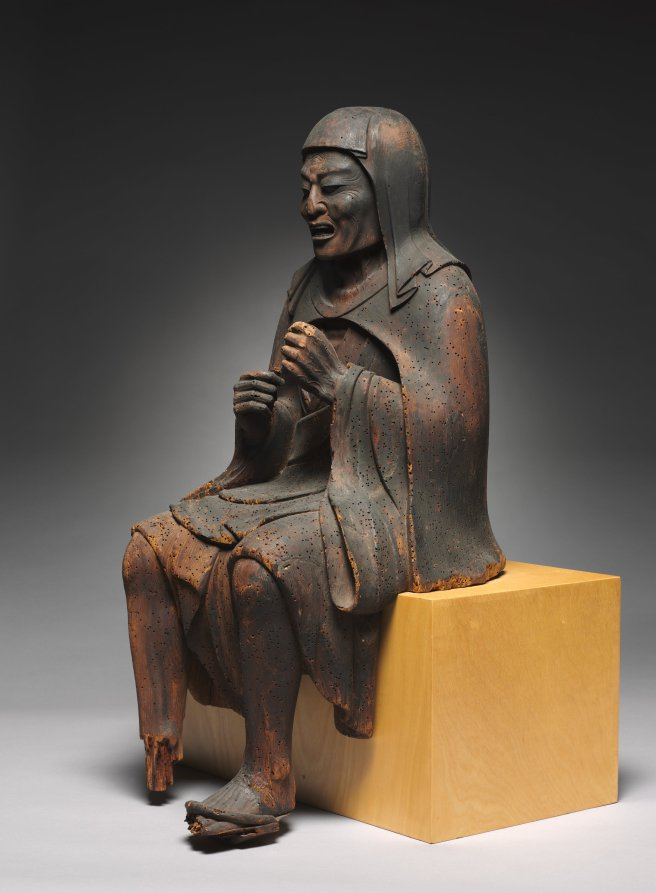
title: En no Gyōja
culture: Japan, Kamakura period (1185–1333)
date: 1200s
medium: wood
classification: Sculpture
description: This Buddhist monk is known as En no Gyōja, or “En the Ascetic” (legendarily 634–701), who is said to have founded Shugendō, a style of religious practice focused on performing challenging, rigorous tests of courage and devotion in mountainous settings.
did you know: This sculpture was once flanked by the demons Zenki and Koki (CMA 2012.40).